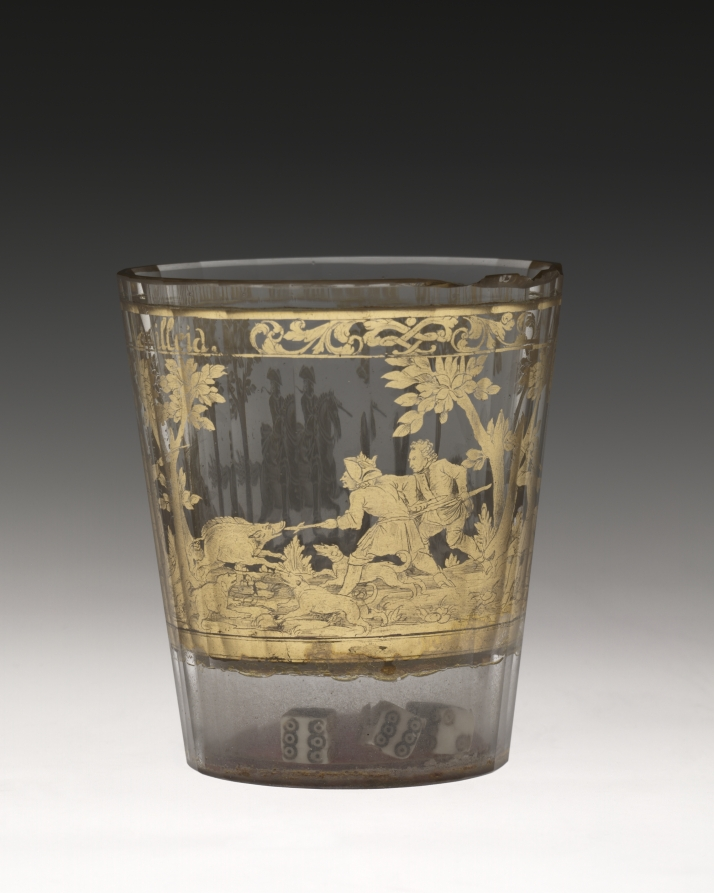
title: Tumbler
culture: Bohemia, 18th century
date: c. 1730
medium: zwischengoldglas (glass)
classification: Glass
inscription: in gold, around rim of glass: Monsigr. Daniel Delfino Patriarcha di Aguilleid